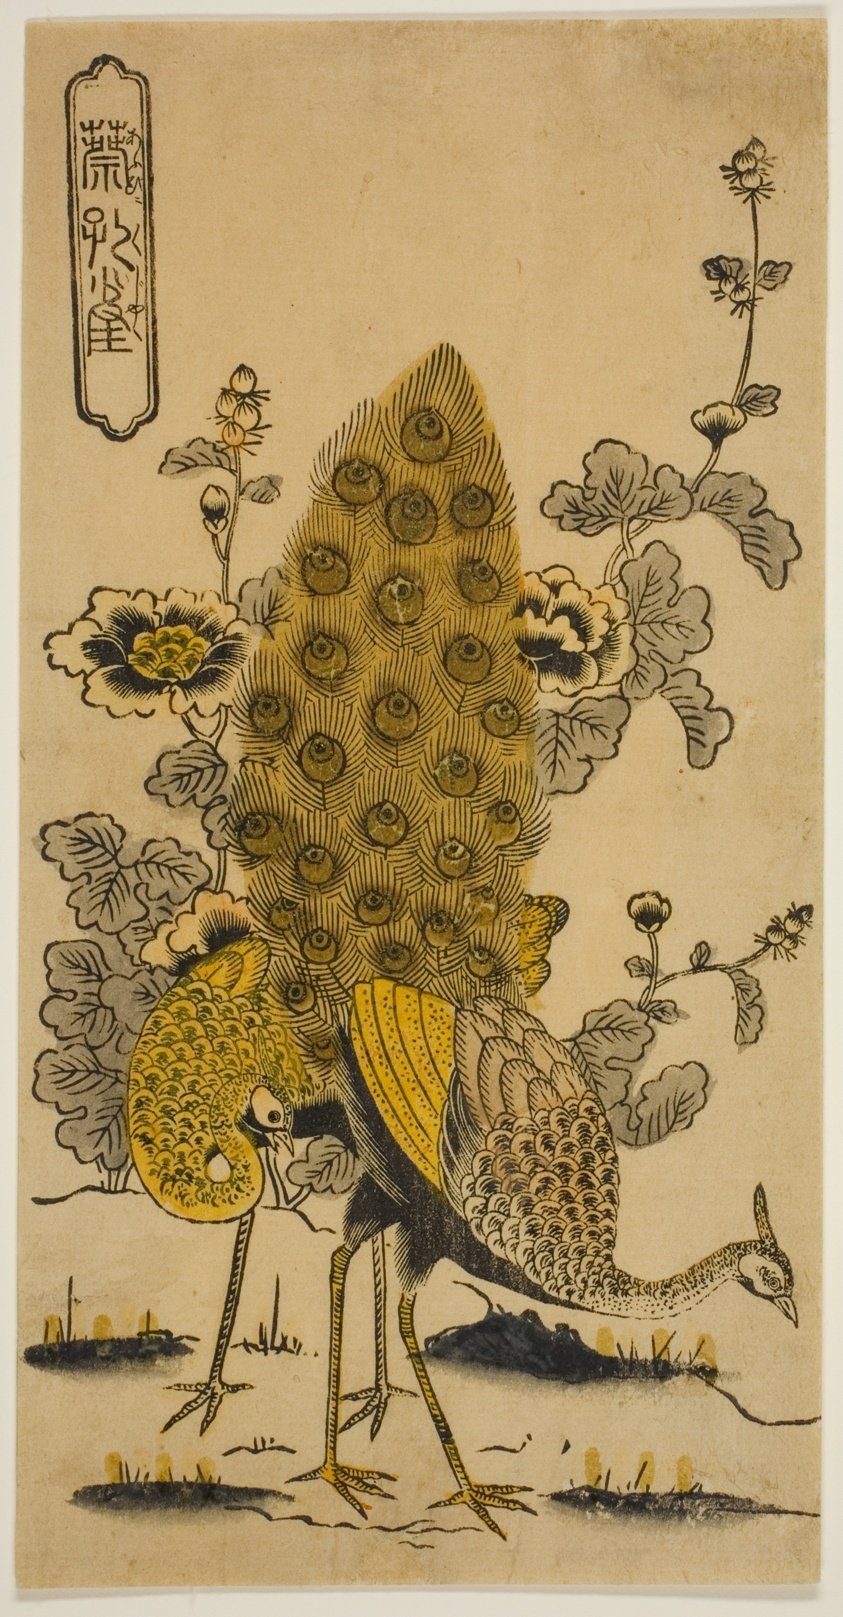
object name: Print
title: Hollyhocks and Peacocks (Aoi ni kujaku)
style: Japanese (culture or style)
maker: Nishimura Shigenobu (Japanese, active c. 1723-1747)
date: early 1730s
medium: Hand-colored woodblock print; hosoban, urushi-e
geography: Japan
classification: woodblock print; print; asian art